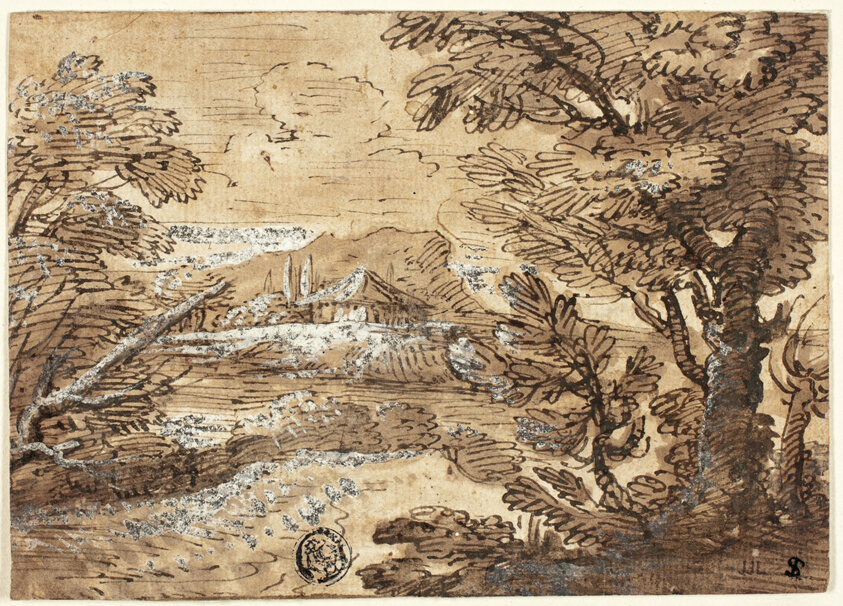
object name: Drawing and Watercolor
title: Landscape with House in Distance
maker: Possibly Ferdinand Kobell; German, 1740-1799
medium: Pen and brown ink with brush and brown wash, heightened with lead white (discolored), on ivory laid paper, laid down on card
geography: Germany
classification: pen and ink drawings; drawings (visual works); prints and drawing